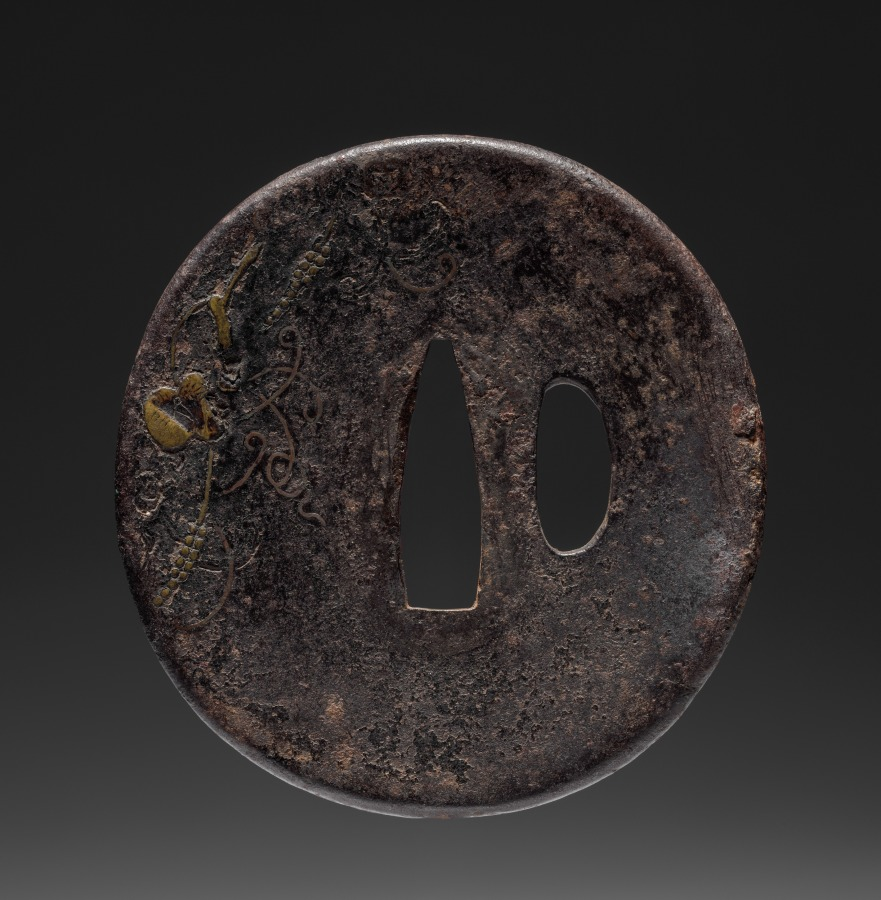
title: Sword Guard (Tsuba)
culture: Japan, possibly Edo period (1615-1868)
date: c. 1615–1868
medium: iron with brass inlay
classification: Arms and Armor